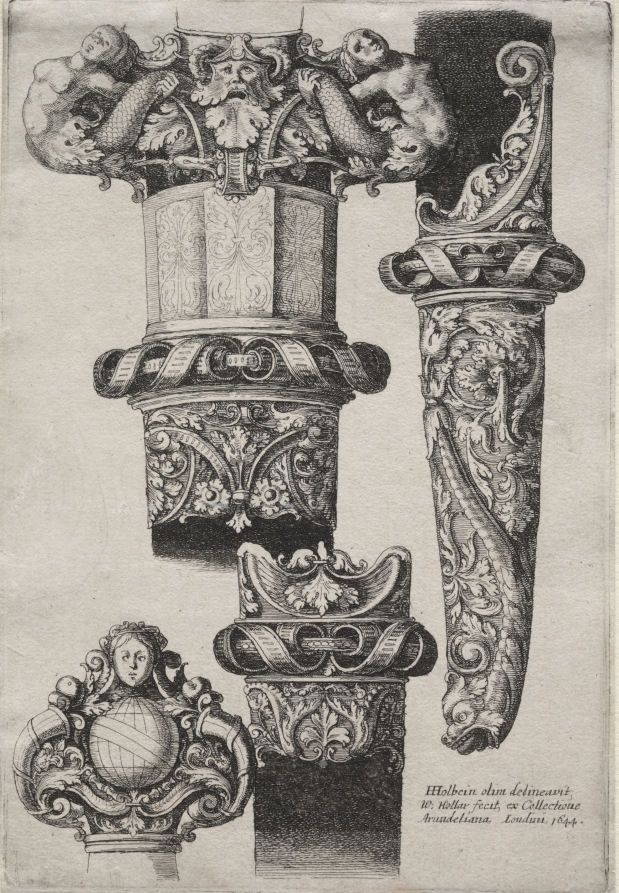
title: Design for Daggers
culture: Bohemia, 17th century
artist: Wenceslaus Hollar (Bohemian, 1607–1677)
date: 1644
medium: etching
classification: Print